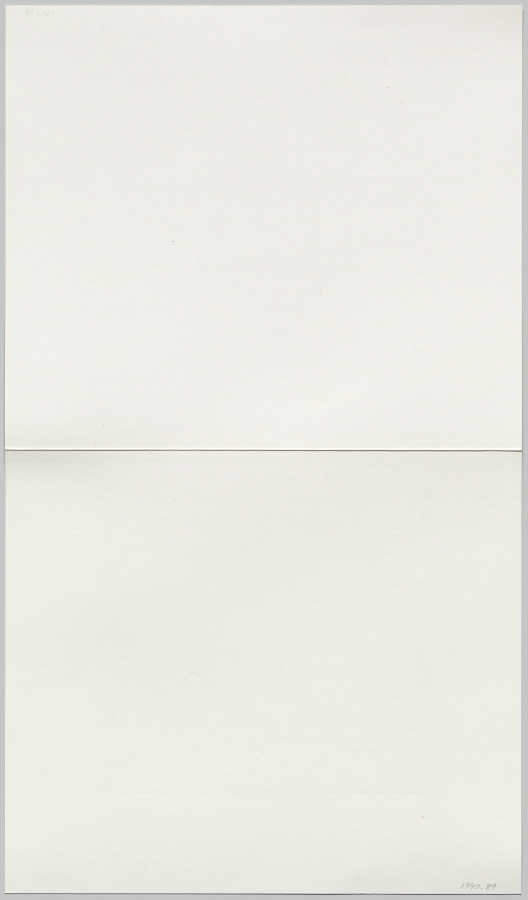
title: Drinking in the Moonlight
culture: China, Southern Song dynasty (1127-1279)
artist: Ma Yuan (Chinese, c. 1150–after 1255)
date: late 1100s–early 1200s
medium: Album leaf; ink on silk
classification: Painting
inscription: 1-1/2 seals: half-seal of Ming imperial collection (used 1372–84); 1 unidentified.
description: Once the moon rises and the wine is finished, perhaps the reclined tipsy gentleman will return to the stone table, where ink, paper, and brush can be seen. For moon enthusiasts in Hangzhou, there was a site named Yue Yan, or Moon Cliff, behind the imperial precincts on Mount Fenghuang. With its geographical features of receding craggy rocks leading to the framed full moon, there is good reason to believe that the scene depicts this specific site. The association of this painting with Ma Yuan is stylistically based. However, the brushwork accords more with the aesthetic approach of his son, Ma Lin.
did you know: The gentleman depicted is relaxing with a cup of wine in his hand.